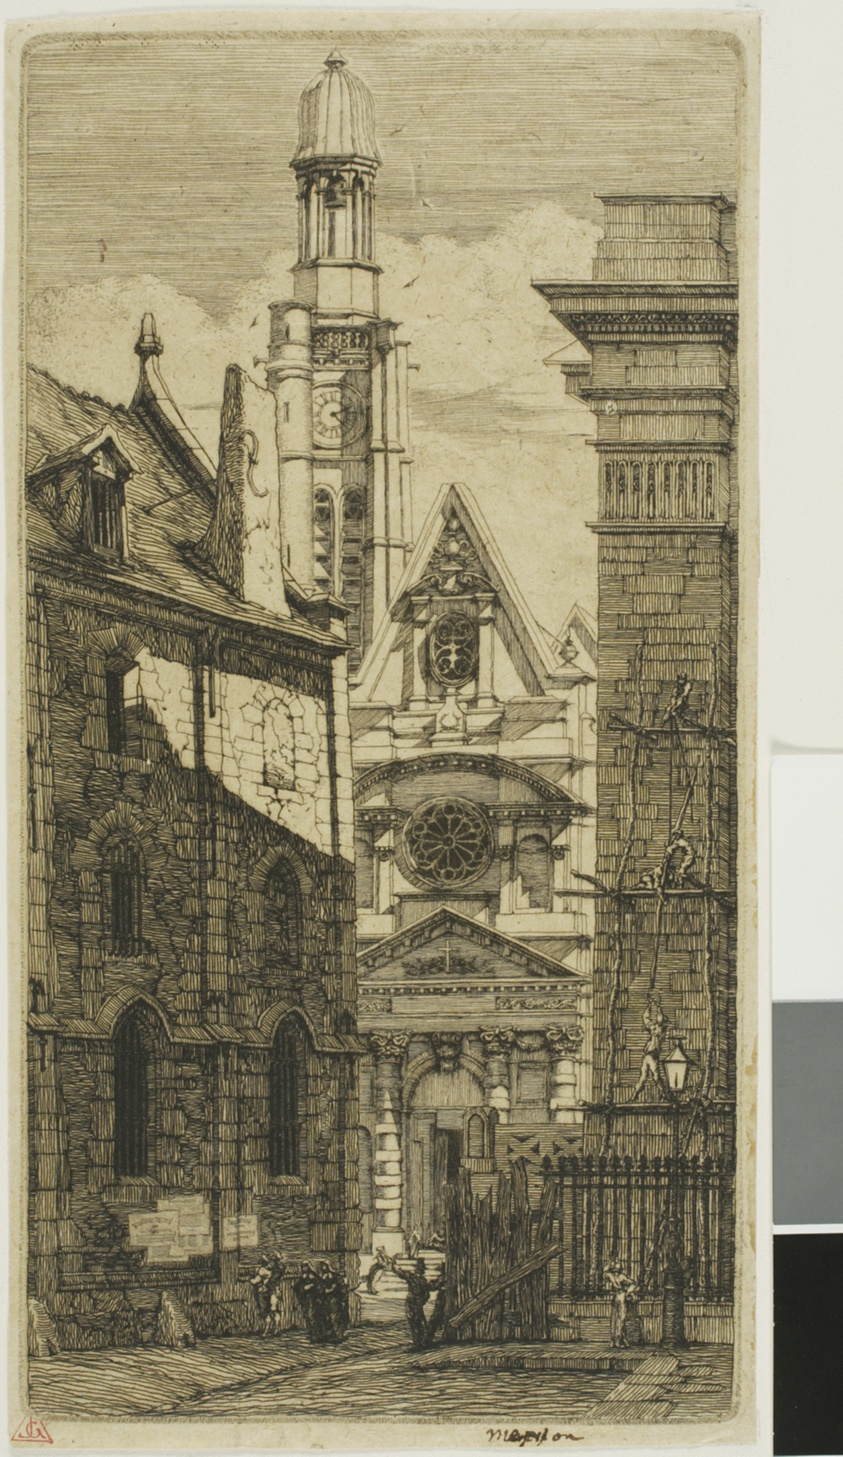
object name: Print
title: Church of St. Etienne du Mont, Paris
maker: Charles Meryon (French, 1821-1868)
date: 1852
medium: Etching on tan wove chine, hinged to ivory wove card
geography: France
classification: etching; print; prints and drawing